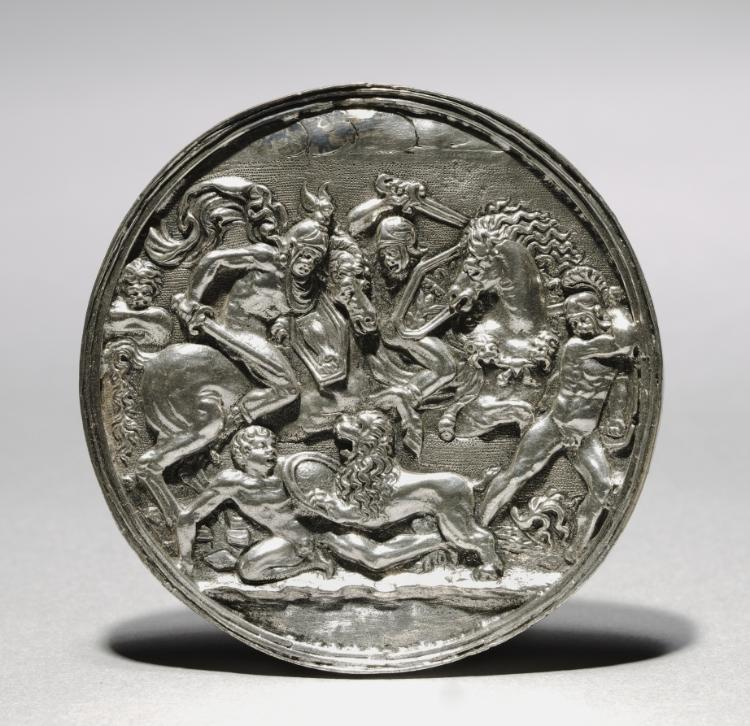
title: Lion Hunt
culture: Netherlands or Germany, 16th century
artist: follower of Moderno (Italian, 1467–1528)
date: 1581 or later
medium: silver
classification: Sculpture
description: The front of this medal contains an animated lion hunt; a nude male defends himself with his shield against an attacking lion while other nude horsemen and soldiers join in the fray. Contrasted against this high relief and classical motif, the reverse has an engraving of ten scenes from the Passion of Christ organized within cloister-like architecture. Starting with the "Last Supper" (on the far left in the center row), the story moves clockwise, ending in the two central scenes that depict Christ's deposition in the tomb and then his miraculous resurrection. The date 1581 is engraved on the altar in the scene of the resurrected Christ. The same Passion composition was also used for the reverse of a 1564 medal for the King of Poland, Sigismund Augustus (1520-1572). The tooling of the relief and the format of the Passion scenes correspond to prototypes and workmanship that suggest the medal was made by a Northern follower of Moderno.